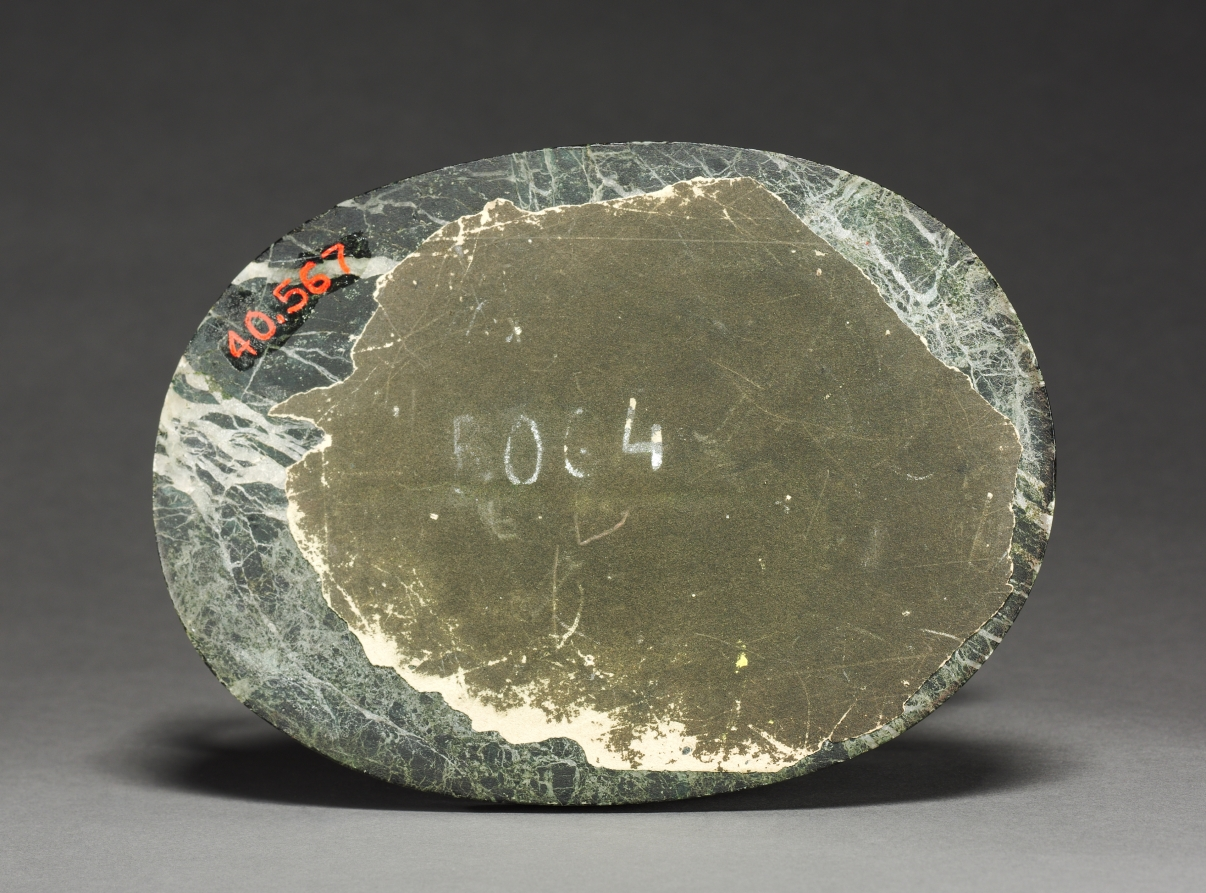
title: Lion and Serpent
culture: France, 19th century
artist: Antoine-Louis Barye (French, 1796–1875)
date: c. 1830 – 1875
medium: bronze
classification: Sculpture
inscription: Signed: "Barye"